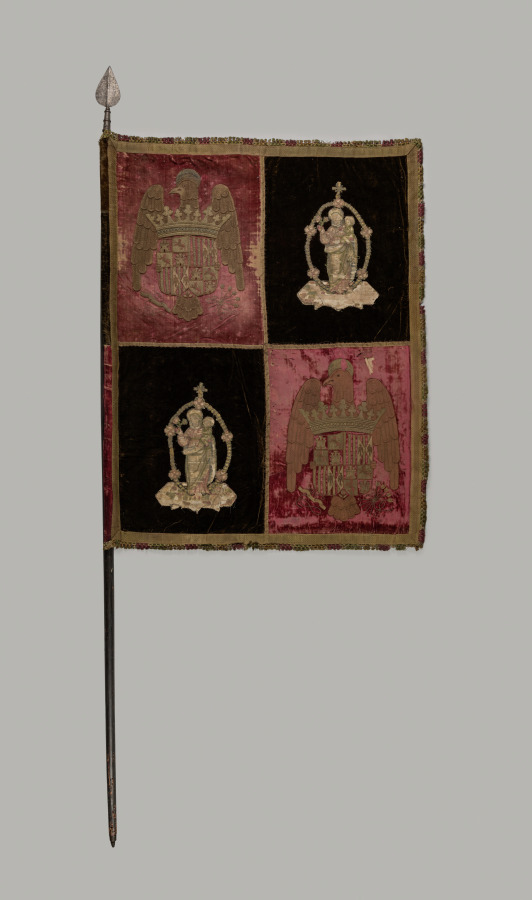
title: Banner with a Quartered Royal Arms of Spain and the Madonna and Child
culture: Spain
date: 1500s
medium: red and dark brown velvet, embroidered; fringe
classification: Velvet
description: This banner is quartered or broken into four parts. Two sections contain embroidered images of the Virgin and Child. The other two are devoted to the royal arms of Spain. On the arms are representations of the kingdoms of Spain in the 1500s. A three towered-castle represents the Kingdom of Castille; the rearing lion is a symbol for the Kingdom of León; two eagles stand for the Kingdom of Sicily; and at the bottom is the pomegranate for Granada. Below this appear a yoke and a bundle of arrows which have been seen on Spain's coat of arms since the union of Ferdinand II of Aragon and Isabella I of Castile.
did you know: This banner was hanging in the armor court when it first opened in 1916.